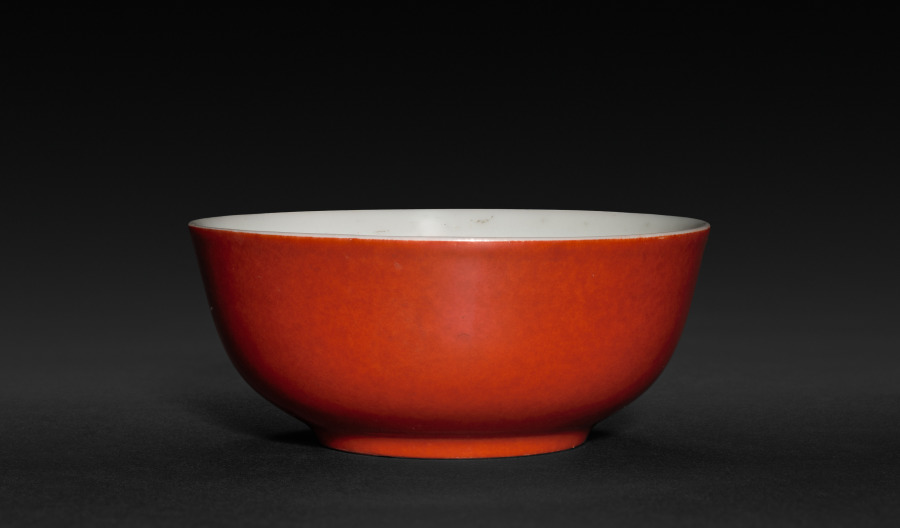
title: Bowl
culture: China, Jiangxi province, Jingdezhen kilns, Qing dynasty (1644-1911), Yongzheng reign (1722-35)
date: 1723–35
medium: porcelain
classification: Ceramic